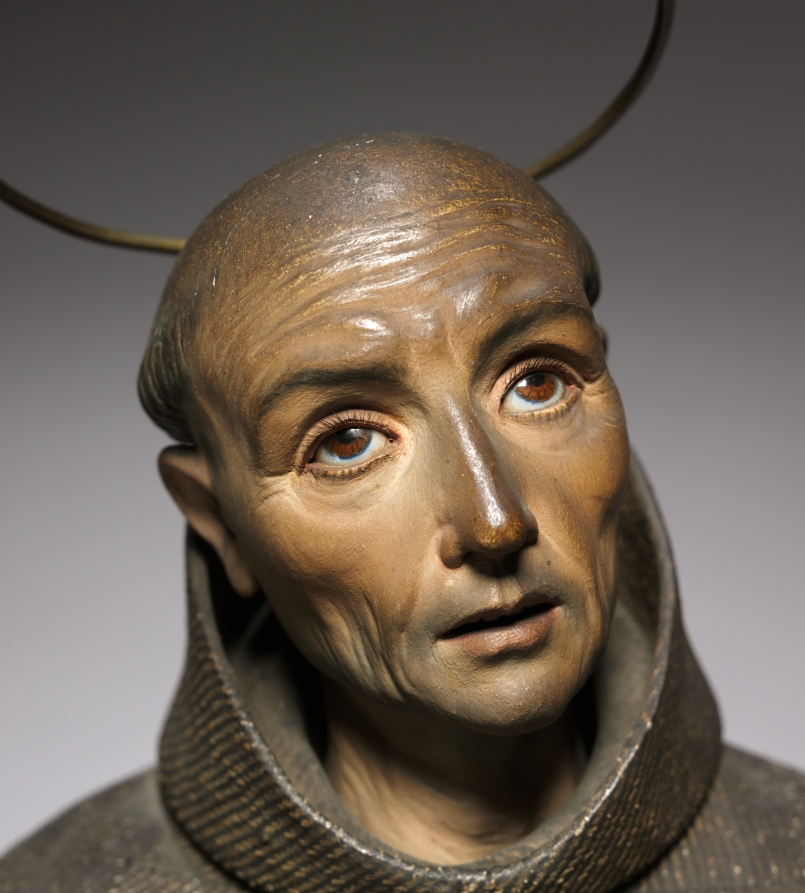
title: Saint Peter of Alcántara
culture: Spain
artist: Pedro de Mena (Spanish, 1628–1688)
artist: and Workshop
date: c. 1663–70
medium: painted wood, with ivory and glass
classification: Sculpture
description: Painted wood sculpture from Spain in the 1600s involved a team of artisans working under a lead sculptor. The sculptor first carved numerous pieces of wood in complex forms. So the paint would stick properly, these fragments were delicately covered in gesso (a combination of white chalk and glue made from animal collagen), preserving the subtle woodcarving underneath. The rough surface of the saint's face—reflecting his age and hardships—came from texturing the gesso with a brush. The glass eyes, probably imported from Venice, were inserted from behind the face before the wood pieces were attached. Finally, the eyelashes were added for a further touch of realism. A painter created the appearance of coarse sackcloth in a distinctive style, with yellow strokes rising off the surface. Smoother brushstrokes form the flesh tones, even revealing the saint's five-o'clock shadow. Unlike other kinds of painting, sculpture from southern Spain at this time was usually not covered in varnish; sculptors prized the unvarnished paint for its realistic effect, although it makes the surface exceptionally delicate and susceptible to dust and dirt, which more easily sticks to the surface.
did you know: Peter of Alcantara was so dedicated to his work he slept only 90 minutes a night--he's the patron saint of night watchmen!